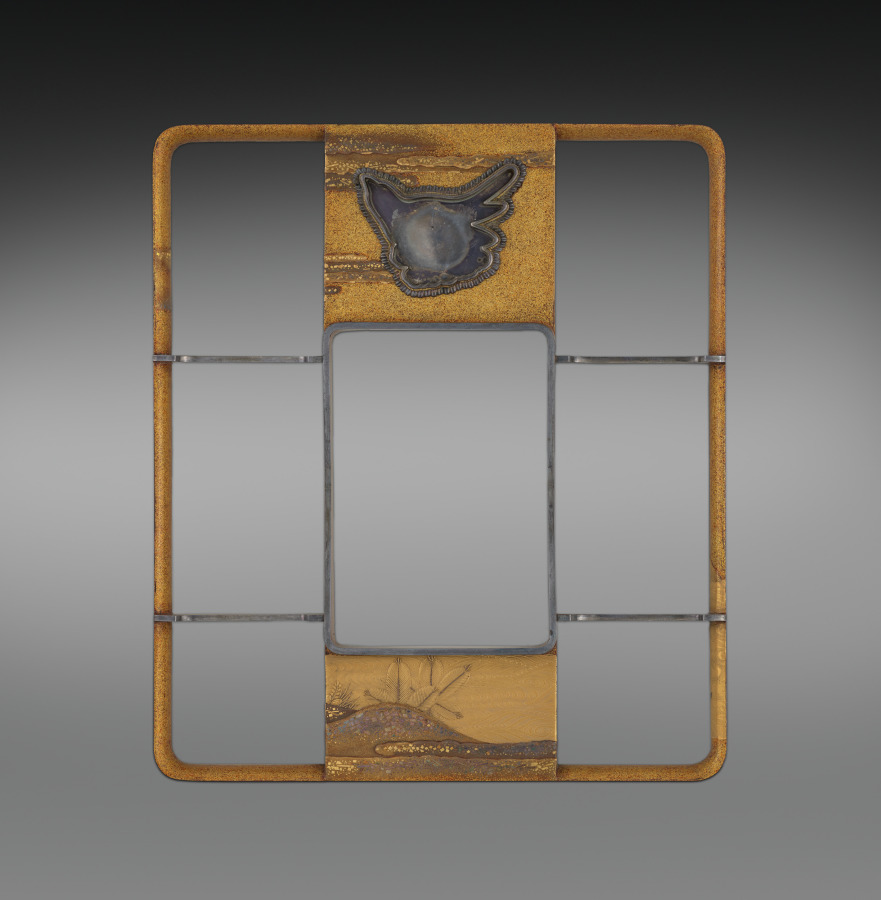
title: Writing Box (Suzuribako) with the “First Song” (Hatsune) Chapter from the Tale of Genji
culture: Japan, Meiji period (1868–1912)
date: early 1900s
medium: Lacquered wood with gold and silver sprinkled powder (maki-e), foil application (kirikane), and metal inlay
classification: Lacquer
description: The design of this box was inspired by an object in the 1639 lacquer wedding set of Chiyohime, the daughter of the shogun (ruler). Information about the set became available in the Meiji period, leading some lacquer artists to emulate its designs. This box features a scene from the chapter “First Song” (Hatsune) of the Tale of Genji, in which Prince Genji and his love Murasaki enjoy her garden. It incorporates the written characters for “first” (初, hatsu) and “sound” (音, ne), indicating the first song of the warbler in spring, associated with the new year—the water dropper for mixing the ink is in the shape of this bird.